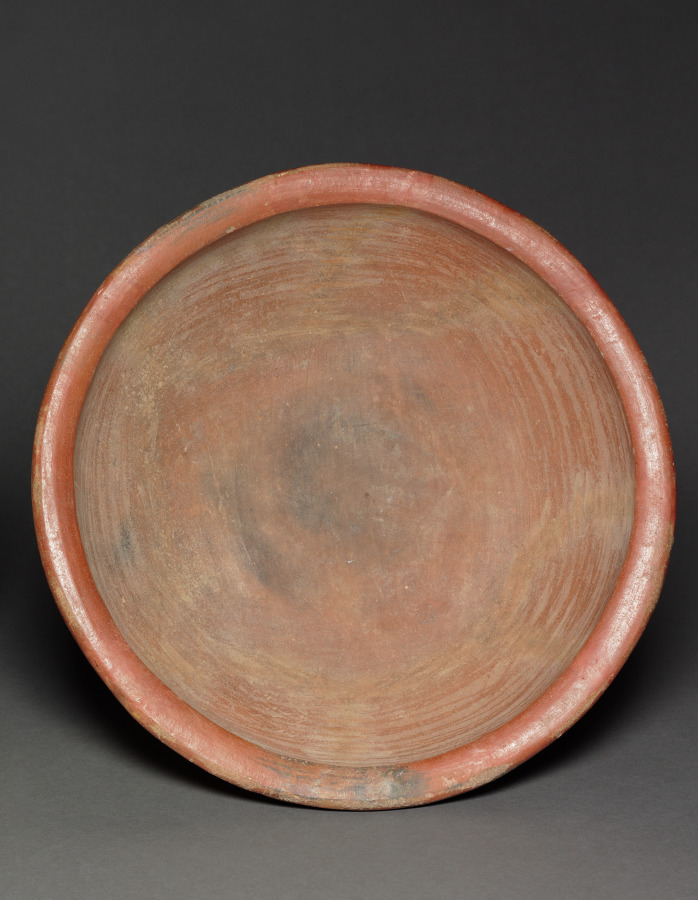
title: Bowl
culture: Costa Rica, Southern Nicoya region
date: c. 600–1100 (Thermoluminescence date, 995–1395)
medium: ceramic, slip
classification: Ceramic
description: Fine ceramics like this were buried in the graves of the high-status dead, some of them certainly leaders of the several groups that competed in the area.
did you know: The lid of this bowl features an iguana.